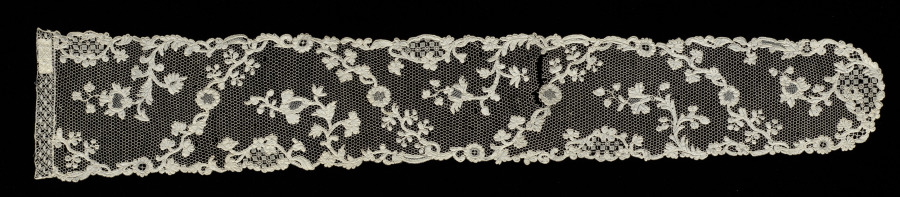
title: Lace Lappet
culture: France, Argentan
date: 1715–74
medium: Linen: needle lace (PoInt de Argentan)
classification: Lace